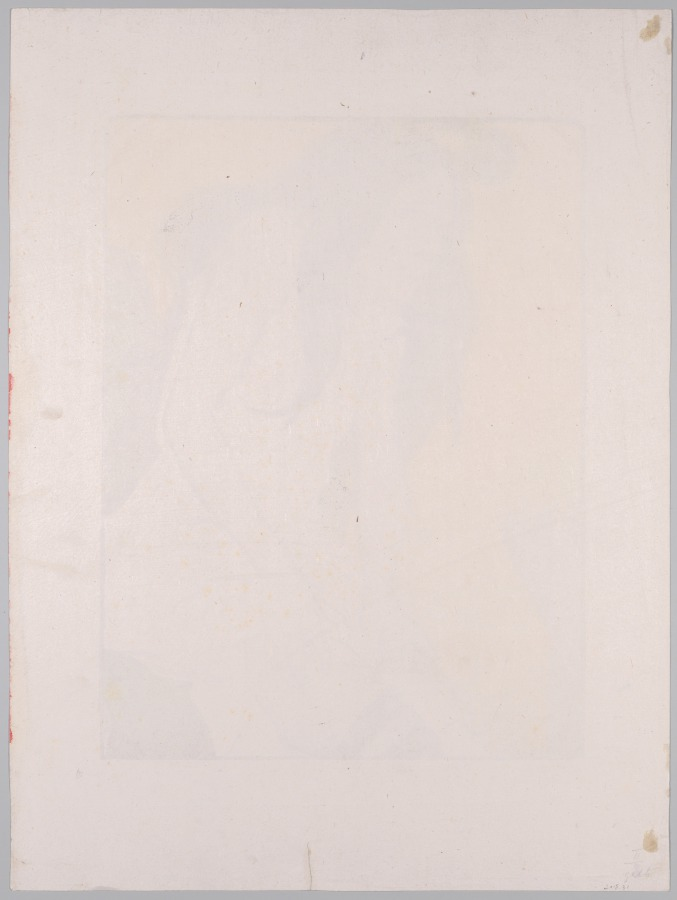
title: Morphine Addict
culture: France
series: L'Album d'estampes originales de la Galerie Vollard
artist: Eugène Grasset (French, 1841–1917)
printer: Auguste Clot (French, 1858–1936)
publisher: Ambroise Vollard (French, 1867–1939)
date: 1897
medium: color lithograph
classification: Print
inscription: Signed in graphite, lower right: Grasset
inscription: in plate, lower left: monogram of the artist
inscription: collector’s mark, lower right: Dr. Albin Woldemar von Dietel (L. 2772b)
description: Eugène Grasset was best known for idealized and decorative images of women. This lithograph, however, focuses on a darker theme—morphine addiction. A young woman is shown at the height of withdrawal as she injects herself with the drug. The syringe was invented just a few decades prior, and its inclusion was meant to give the image a sense of modernity.